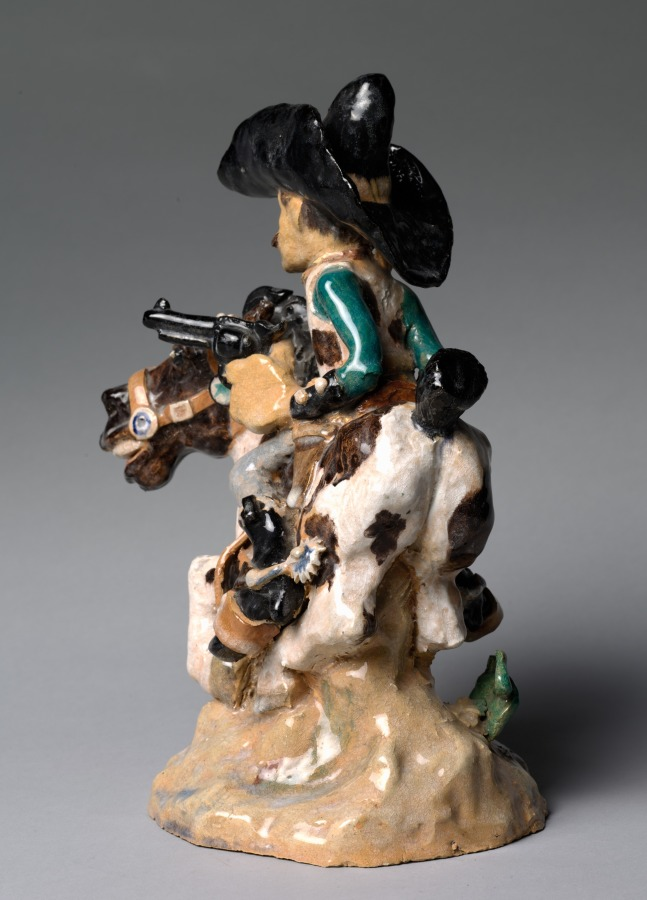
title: Sheriff of Pecos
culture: America, Ohio, Cleveland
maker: Russell Barnett Aitken (American, 1910–2002)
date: 1931–32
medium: ceramic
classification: Ceramic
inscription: Signed on the base on the back side "Russell Aitken"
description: Figural studies were emphasized in ceramics classes at the Kunstgewerbeschule, where Clevelanders Viktor Schreckengost and Russell Barnett Aitken studied in 1929–30. Aitken absorbed the Viennese style of exaggeration and caricature as seen in this depiction of a popular folk hero of the Wild West, incorporating such motifs into his work for the rest of his career.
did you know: Caricature, or the exaggeration of prominent features, was a hallmark of Russell Barnett Aitken's style of modeling figures.